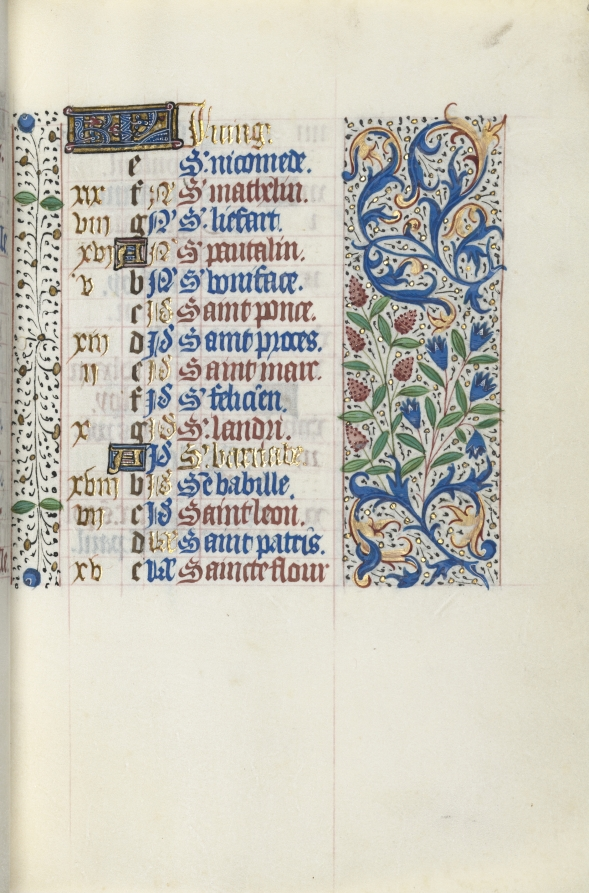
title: Book of Hours (Use of Rouen): fol. 51r, Calendar Page for June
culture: France, Rouen, 15th century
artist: Master of the Geneva Latini (French, active Rouen, 1460–80)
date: c. 1470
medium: ink, tempera, and gold on vellum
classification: Bound Volume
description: In the late 1400s and early 1500s Rouen was an established and important center of book production. The city’s cathedral had a wealthy chapter that spent large sums of money to commission books and to maintain its extensive library. The stationers and booksellers would have likely been concentrated in or near the cathedral precinct. This artist, named after a manuscript now in Geneva, was Rouen’s principal illuminator during the second half of the 1400s.